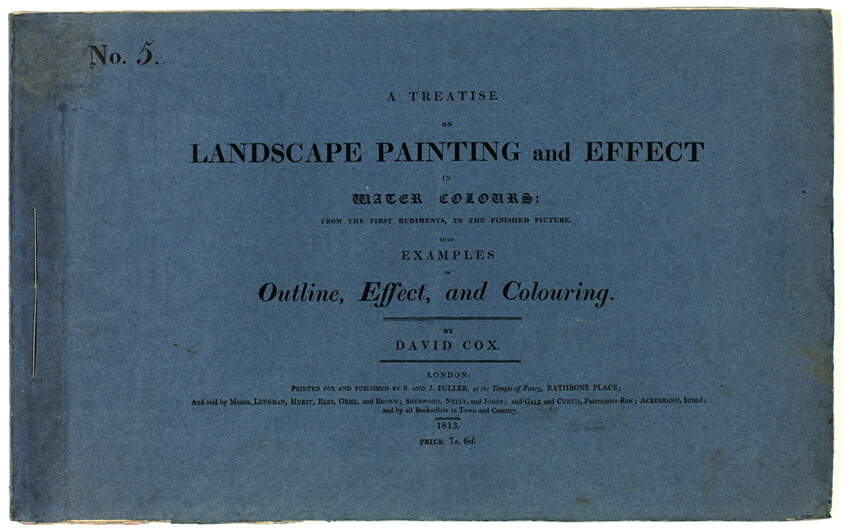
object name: Book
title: A Treatise on Landscape Painting and Effect in Water Colours: From the First Rudiments, to the Finished Picture No. 5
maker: David Cox, the elder (English, 1783-1859); engraved by Richard Reeve (English, 1780-c. 1835); published by S. and J. Fuller (English, 19th century)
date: 1813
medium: Book with four aquatints and letterpress in black on cream wove paper, in box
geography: England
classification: book; paper; prints and drawing